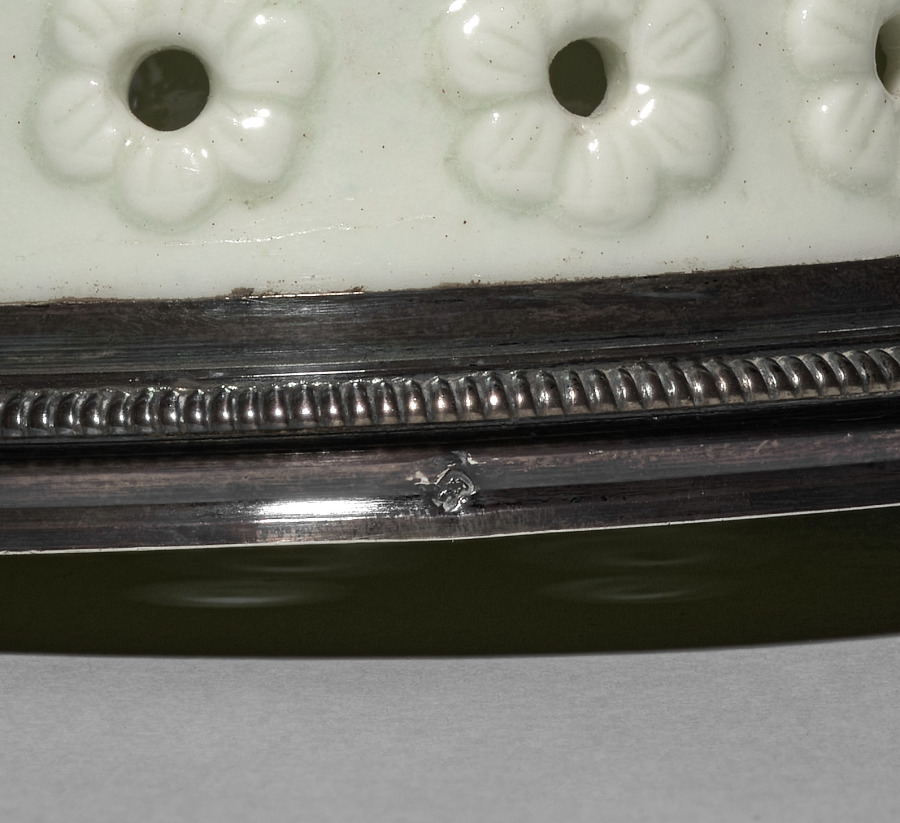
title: Sugar Caster (cover)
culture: France, Saint Cloud, 18th century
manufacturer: Saint Cloud Porcelain Factory (French)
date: c. 1732– 1738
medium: soft-paste porcelain, silver mount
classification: Ceramic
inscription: [Discharge mark of Hubert Louvet, 1732-1738 (Dog's head in profile), on both sections of silver mount]